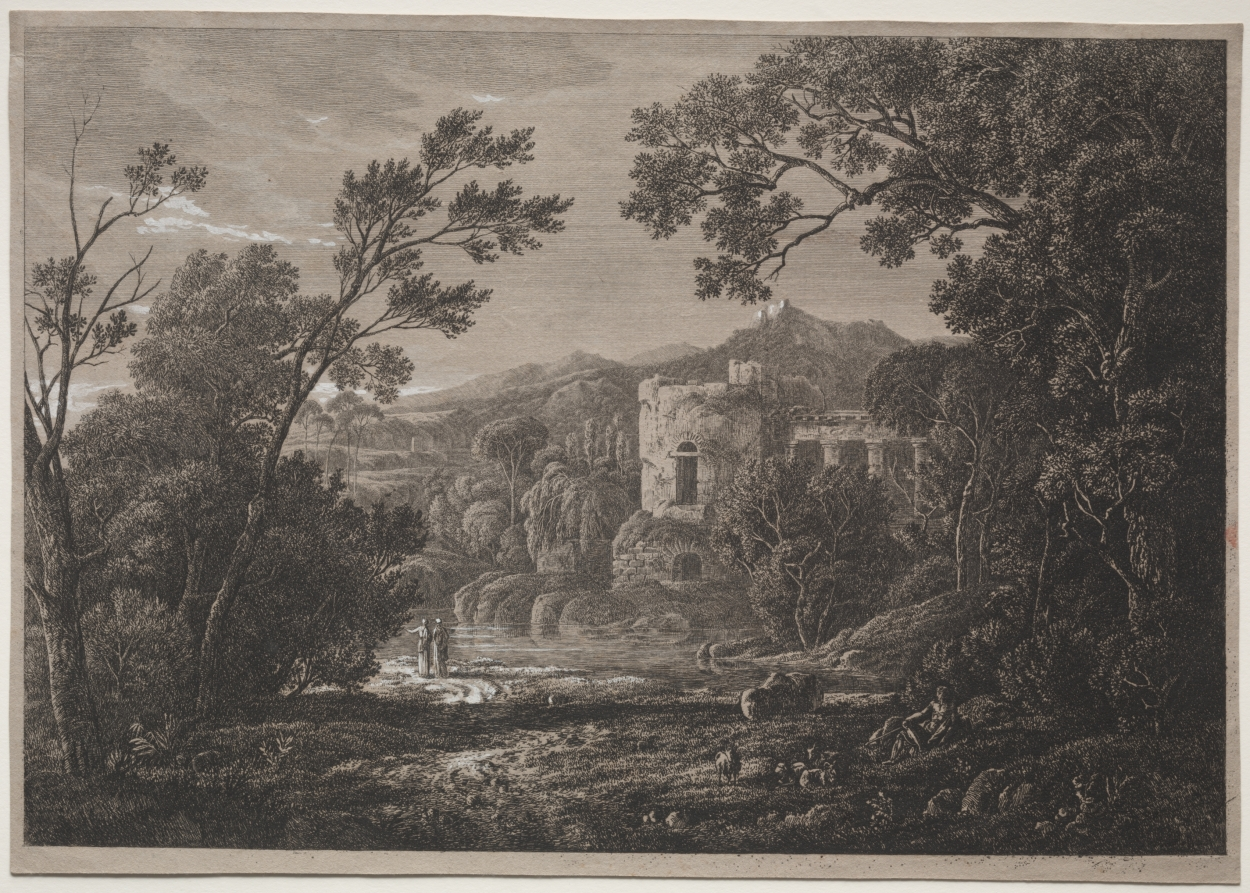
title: An Italian View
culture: Austria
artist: Joseph Rebell (Austrian, 1787–1828)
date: c. 1810?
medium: etching heightened with white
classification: Print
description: Rebell’s early work, such as this Italian view, had strong overtones of classicism and was influenced by Claude Lorrain’s heroic depictions of the landscape. Rebell spent long periods in Italy, first visiting Milan in 1810, Naples in 1813, and Rome in 1816. More active as a painter, he made a small number of prints. This evocative etching printed on brown paper and enlivened with white heightening reveals his painterly inclinations.